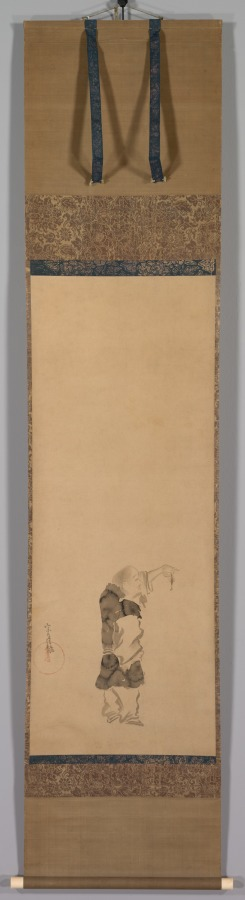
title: Kenshu, Monk with Shrimp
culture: Japan, Edo period (1615–1868)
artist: studio of Tawaraya Sōtatsu (Japanese, c. 1570–c. 1640)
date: c. 1600–1640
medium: hanging scroll; ink on paper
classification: Painting